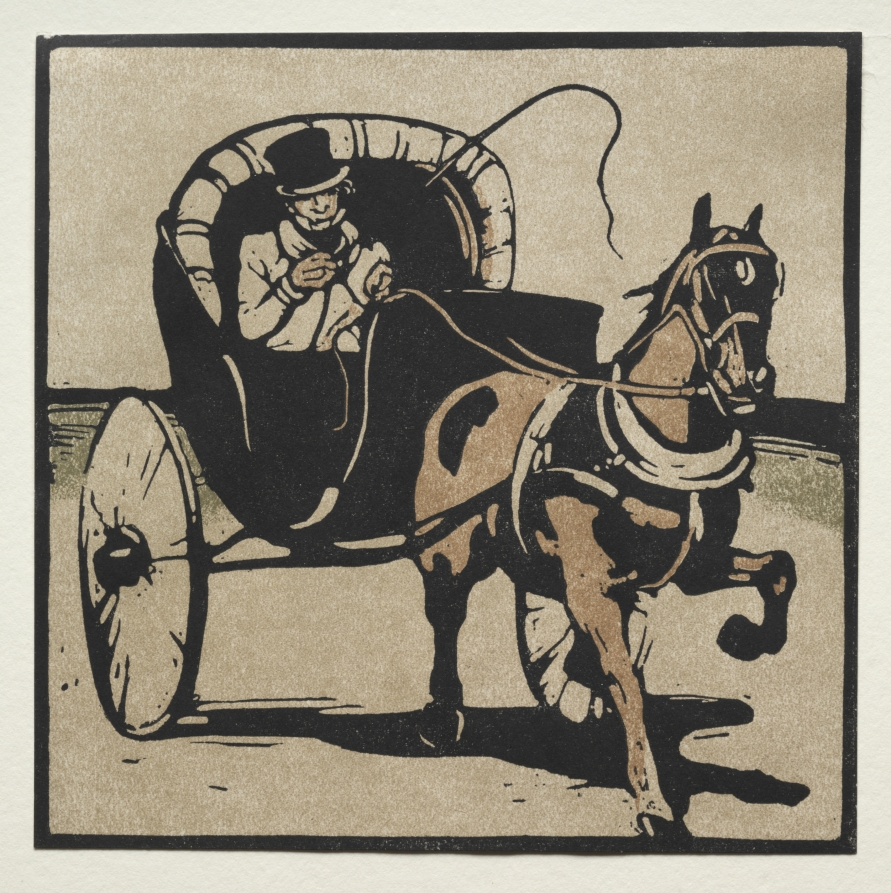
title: The Cabriolet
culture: England, 20th century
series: Published in The Studio, 1897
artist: William Nicholson (British, 1872–1949)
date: 1897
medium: woodcut printed with lithographic colors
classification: Print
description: Nicholson first produced his designs as woodcuts which he hand-colored with watercolor. Following this model, lithography was used to print color for large editions.